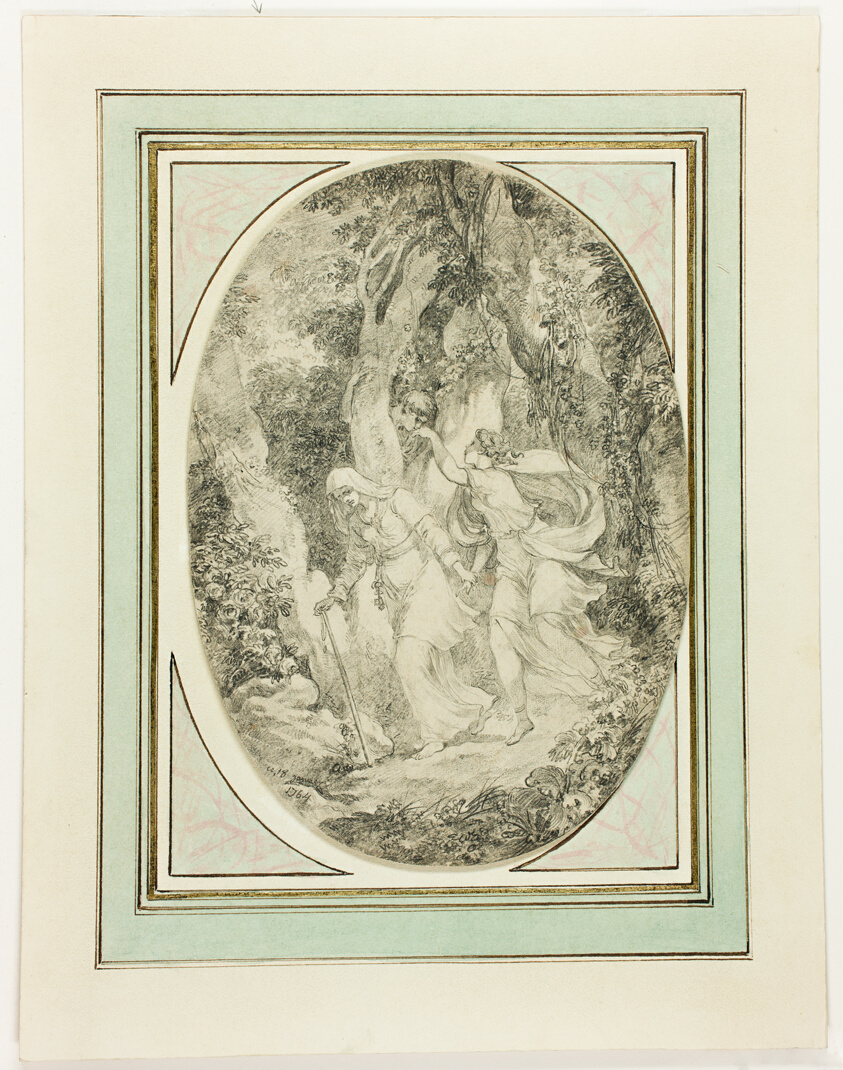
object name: Drawing and Watercolor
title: Allegory-Ingenius Love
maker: Jean-Honoré Fragonard; French, 1732-1806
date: 1764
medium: Black chalk on cream laid paper, laid down on cream laid card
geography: France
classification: chalk; drawings (visual works); prints and drawing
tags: triangles, prints and drawings